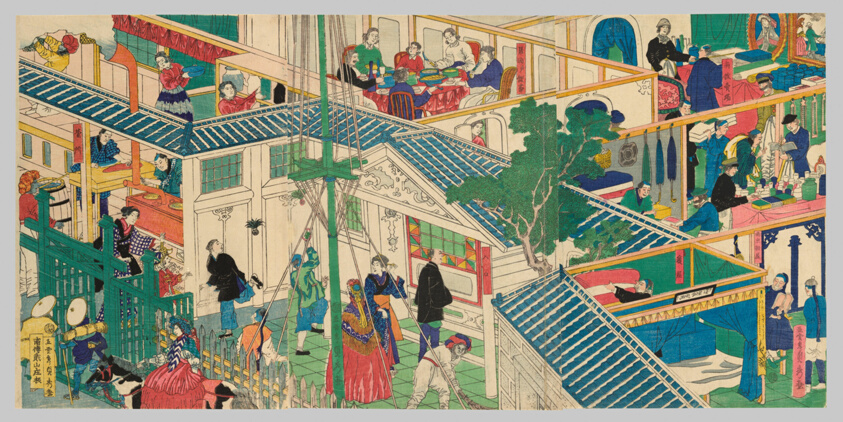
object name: Print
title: Foreign merchant house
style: Japanese (culture or style)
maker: Utagawa Sadahide (Japanese, 1807-1873)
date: 1865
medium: Color woodblock print; oban triptych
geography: Japan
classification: woodblock print; print; asian art